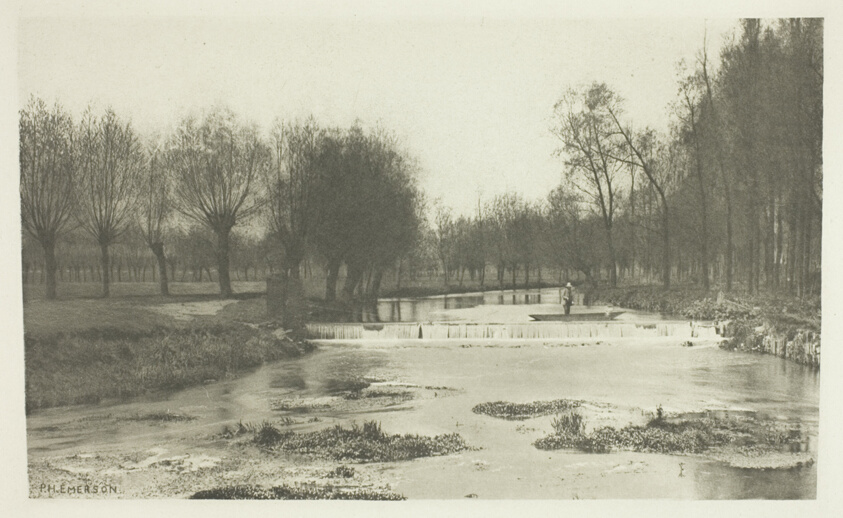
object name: Photograph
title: The Shoot, Amwell Magna Fishery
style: 19th century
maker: Peter Henry Emerson (English, born Cuba, 1856–1936)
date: 1880s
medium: Photogravure, plate VI from the album "The Compleat Angler or the Contemplative Man's Recreation, Volume I" (1888)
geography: England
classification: photogravure; photomechanical process; photography; photograph